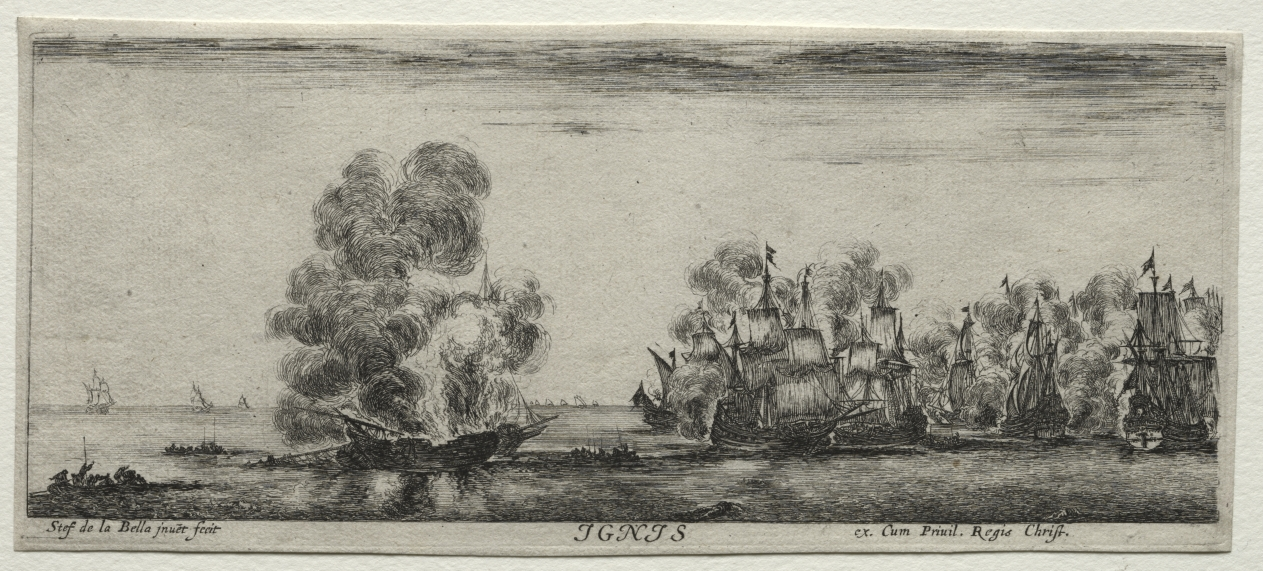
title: The Four Elements: Ignis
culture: Italy, 17th century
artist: Stefano Della Bella (Italian, 1610–1664)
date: c. 1648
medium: etching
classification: Print